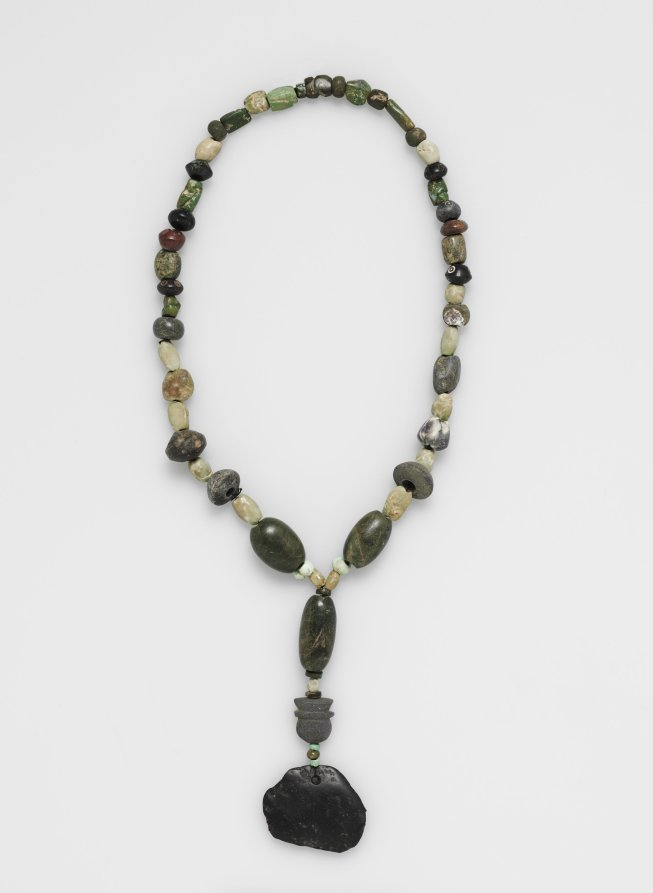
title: Necklace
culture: Peru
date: before 1532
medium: turquoise and stone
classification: Jewelry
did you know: These ancient beads were restrung in modern times.